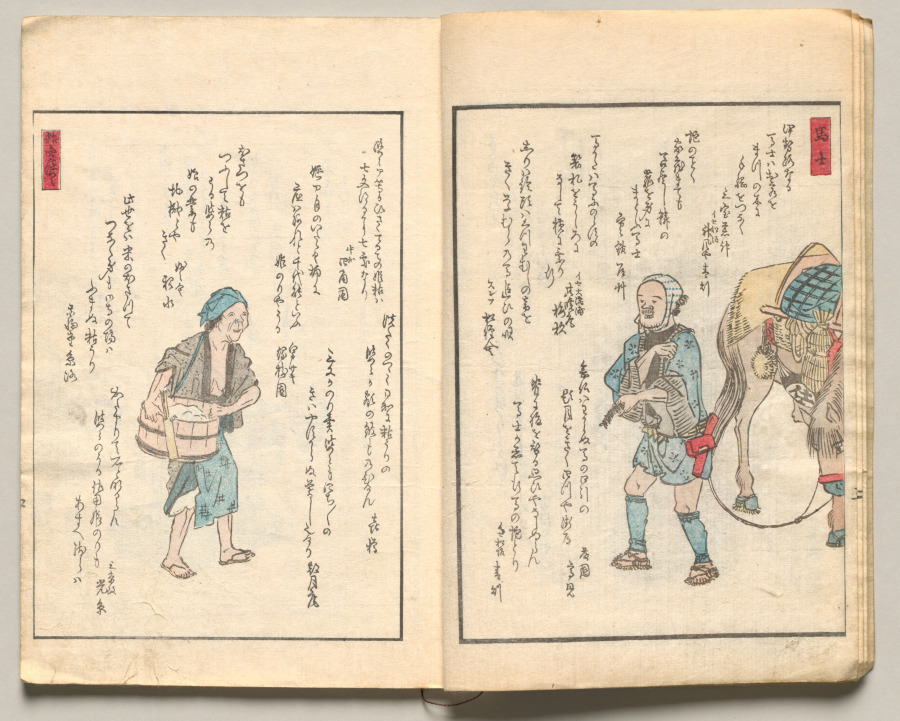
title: Spread Four from Volume Five of People of Japan in Light Verse (Kyōka)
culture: Japan, Edo period (1615–1868)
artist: Utagawa Hiroshige (Japanese, 1797–1858)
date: 1857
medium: Woodblock-printed book; ink and color on paper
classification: Bound Volume